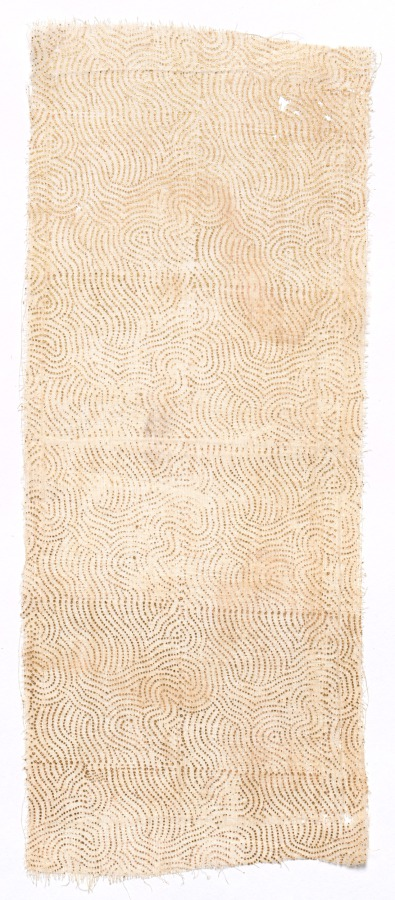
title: Fragment of Draped Court Apparel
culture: India, Rajasthan or Northern Deccan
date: 1700s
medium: Block printed with gold leaf (varak) on undyed plain weave cotton muslin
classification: Textile